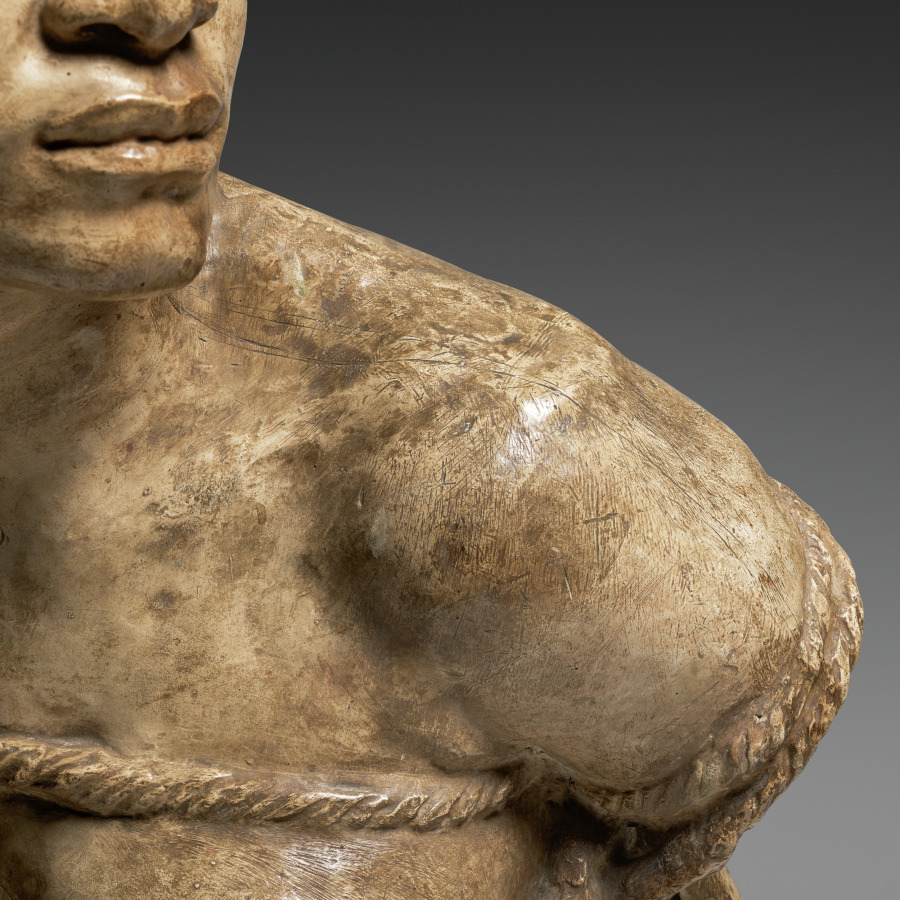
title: Why Born Enslaved!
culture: France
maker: Jean-Baptiste Carpeaux (French, 1827–1875)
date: 1867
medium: Plaster, original polychromed surface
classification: Sculpture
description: One of the most powerful expressions of abolitionist sentiment in the visual arts, Why Born Enslaved! depicts an African woman bound by ropes and looking defiantly upward. The ropes press painfully into her breasts; her torn blouse alludes to the violence responsible for her condition. The original, polychromed surface is covered with complex, nuanced hatchings and subtle modeling. Evidence indicates that this masterpiece of 19th-century French sculpture served as the master model for numerous casts in other museum collections.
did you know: Although officially abolished in France since 1848, slavery remained a hotly contested issue in Carpeaux’s time as it remained legal or tolerated in various countries around the world.